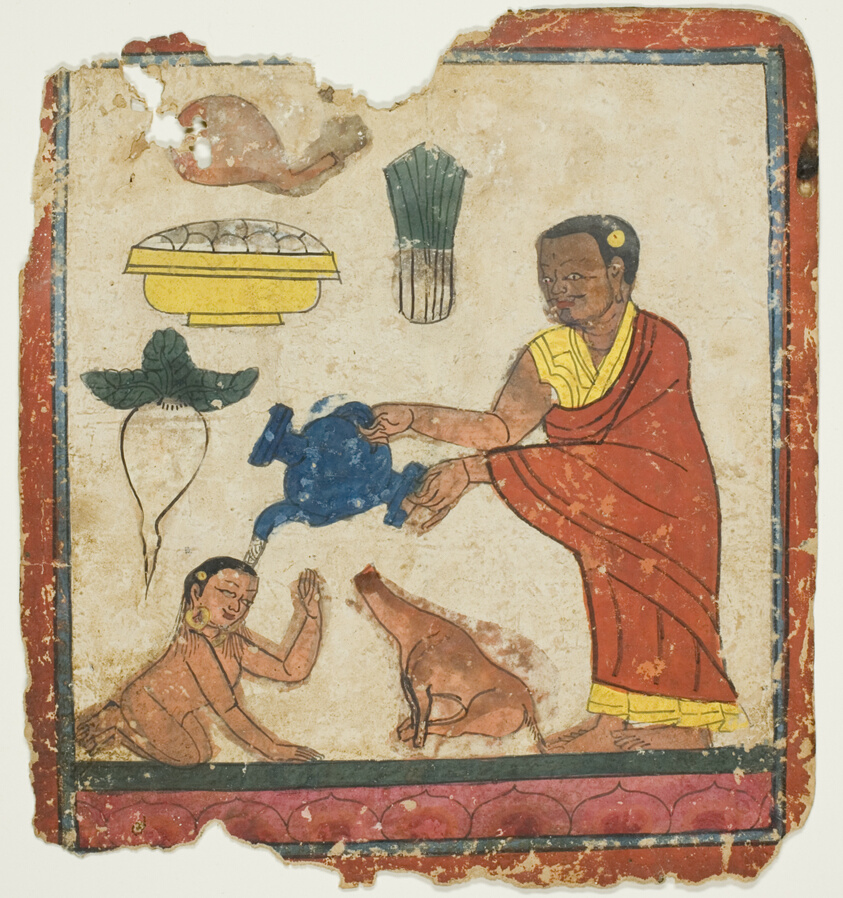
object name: Painting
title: Image from a Set of Initiation Cards (Tsakali)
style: Himalayan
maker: Southern Tibet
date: 14th/15th century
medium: Ink and watercolor on paper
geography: Tibet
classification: ink; painting